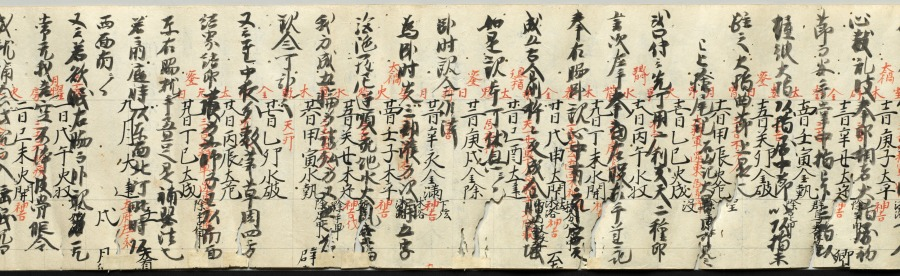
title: Scroll of Miscellaneous Notes written on a Calendar by Priest Seigen (verso)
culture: Japan, Kamakura period (1185–1333)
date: c. 1200–1231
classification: Manuscript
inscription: bears miscellaneous notes written by Priest Seigen.